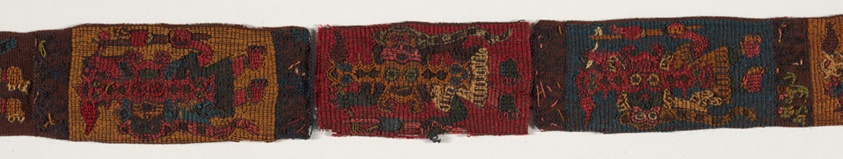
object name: Textile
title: Fragments (Border)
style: nazca, paracas, andean, andes, Pre-Columbian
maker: Nazca; Peru, south coast, Nazca Valley, Coyungo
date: 100 B.C./A.D. 200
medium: Cotton, plain weave; embroidered with camelid wool and cotton in stem and running stitches.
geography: Peru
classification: textile; needlework (visual works)